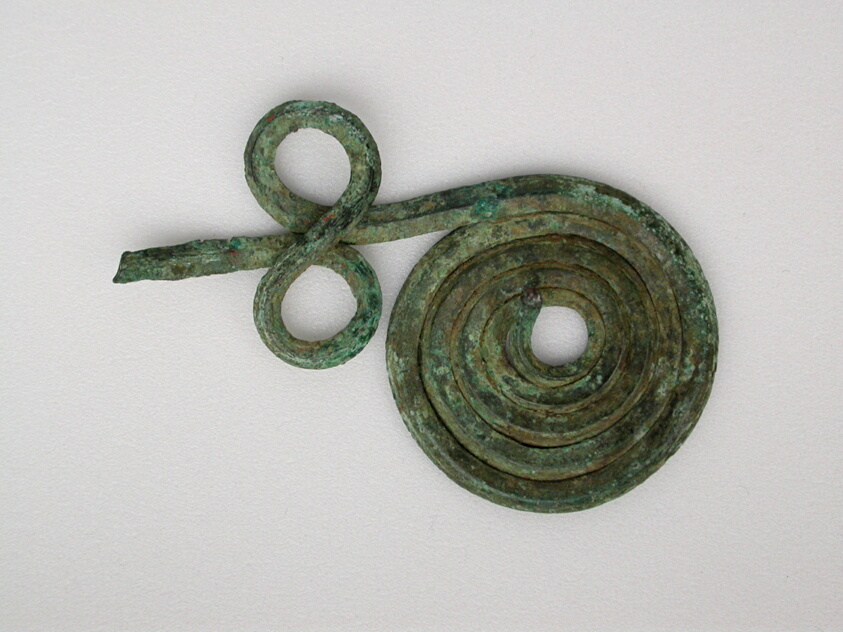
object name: Costume and Accessories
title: Spiral Fibula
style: geometric, ancient, greek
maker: Greek; Thessaly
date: Geometric Period (800–700 BCE)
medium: Bronze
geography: Thessalía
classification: votive offering; ex-voto; fibula; costume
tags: spiral